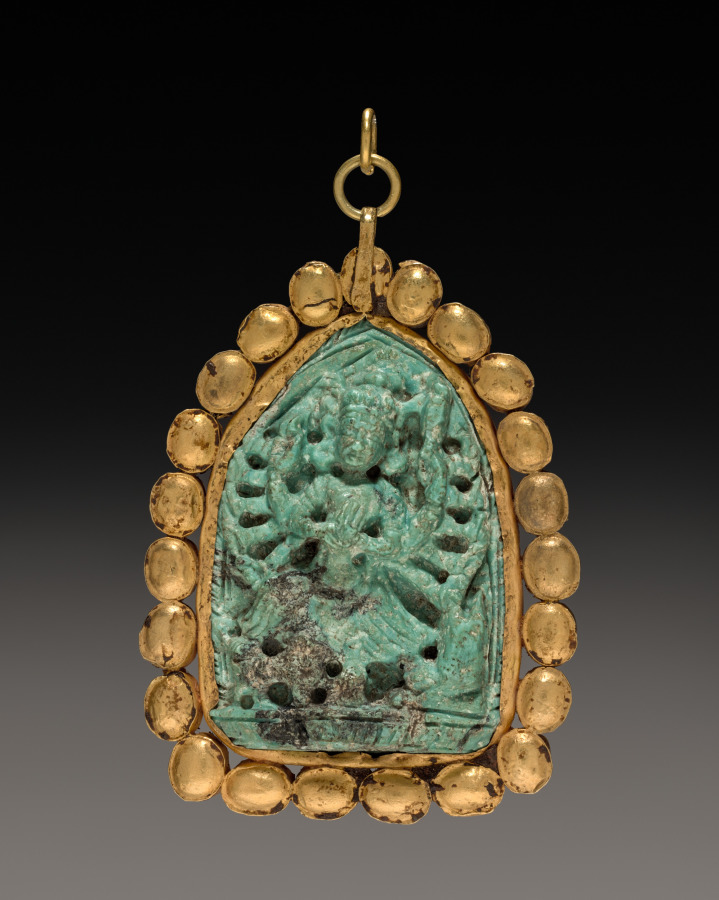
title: Pendant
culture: Tibet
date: 1800s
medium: turquoise with semi-precious stones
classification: Jewelry